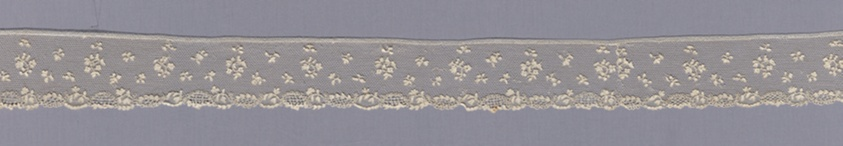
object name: Textile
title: Border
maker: France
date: 1775/1800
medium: Linen, needle lace of a type known as "Point d'Argentan" with buttonholed mesh ground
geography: France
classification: textile; lace - needle